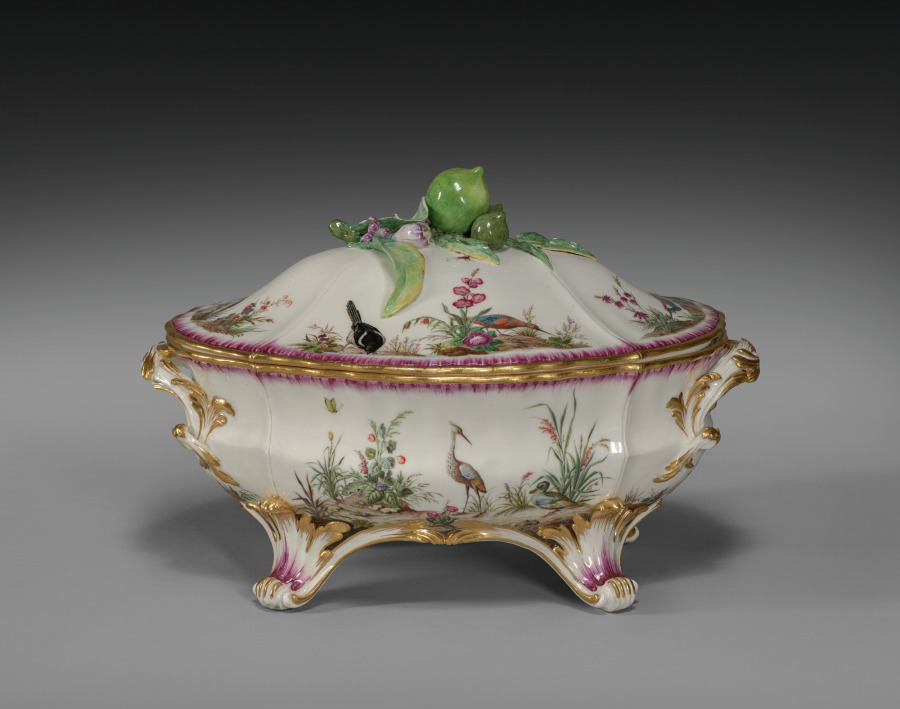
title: Covered Tureen (Terrine ancienne or Terrine ordinaire)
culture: France, Vincennes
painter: attributed to Louis-Denis Armand (French, active c. 1745–1783)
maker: Vincennes Porcelain Factory (France, 1740–56)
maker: probably by Jean-Claude Duplessis le Père (French, 1690–1774)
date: c. 1752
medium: soft-paste porcelain with enamel and gilt decoration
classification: Ceramic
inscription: [Interlaced foliate 'L's surmounted by a fleur-de-lys (indicating royal commision), in blue]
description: The intricately painted birds that decorate this tureen are the work of Louis-Denis Armand. Armand was known for his depictions of birds and landscapes, a specialty that may have come from his work as a painter of lacquered furniture with similar compositions. This tureen was likely designed by master goldsmith Jean-Claude Duplessis who began working as an artistic director at the Vincennes Porcelain Factory in 1748.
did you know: This object was manufactured in soft-paste porcelain, a material used by many European porcelain factories before they were able to emulate the hard-paste porcelain of China and Japan.